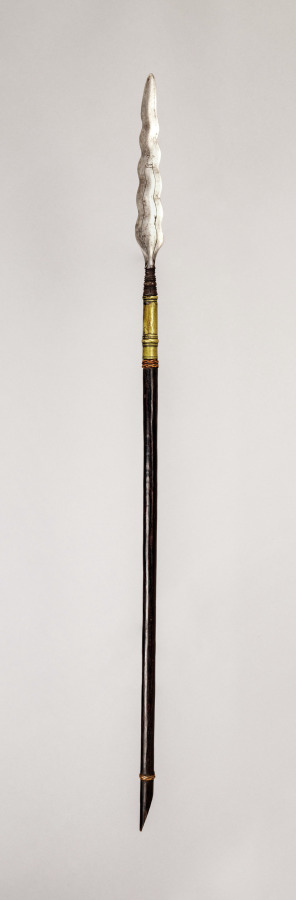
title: Spear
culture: Philippines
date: before 1922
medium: Point: metal and brass ferrule; handle: wood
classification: Arms and Armor